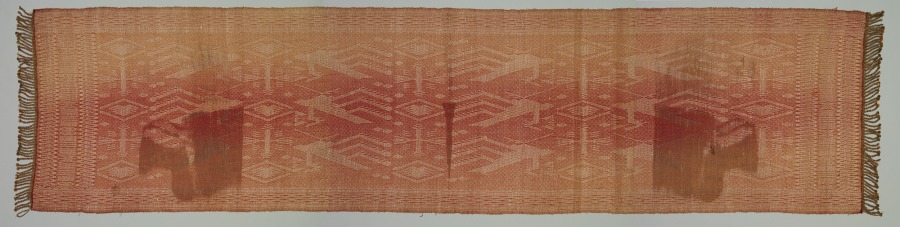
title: Brocade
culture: Indonesia, Sumatra, Minangkabau, late 19th century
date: late 1800s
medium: brocade; silk and metal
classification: Textile